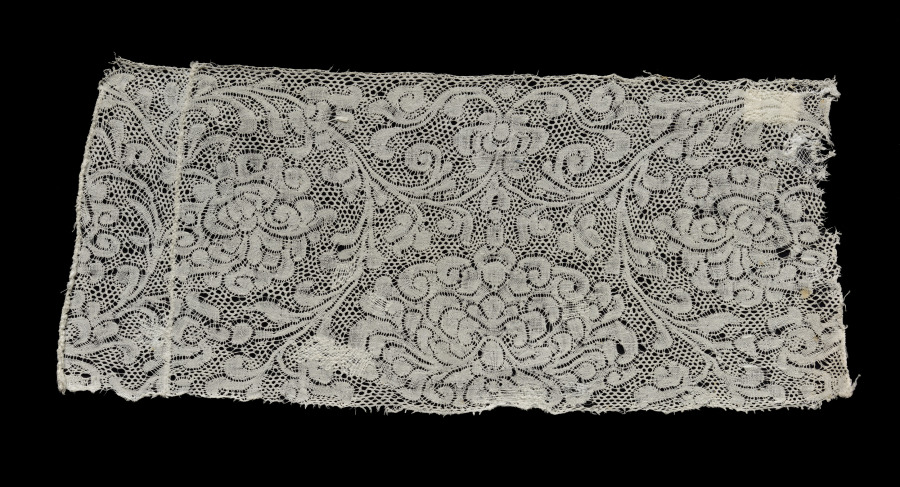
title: Lace Edging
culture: Belgium, Binche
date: early 1700s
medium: Linen: bobbin lace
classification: Lace